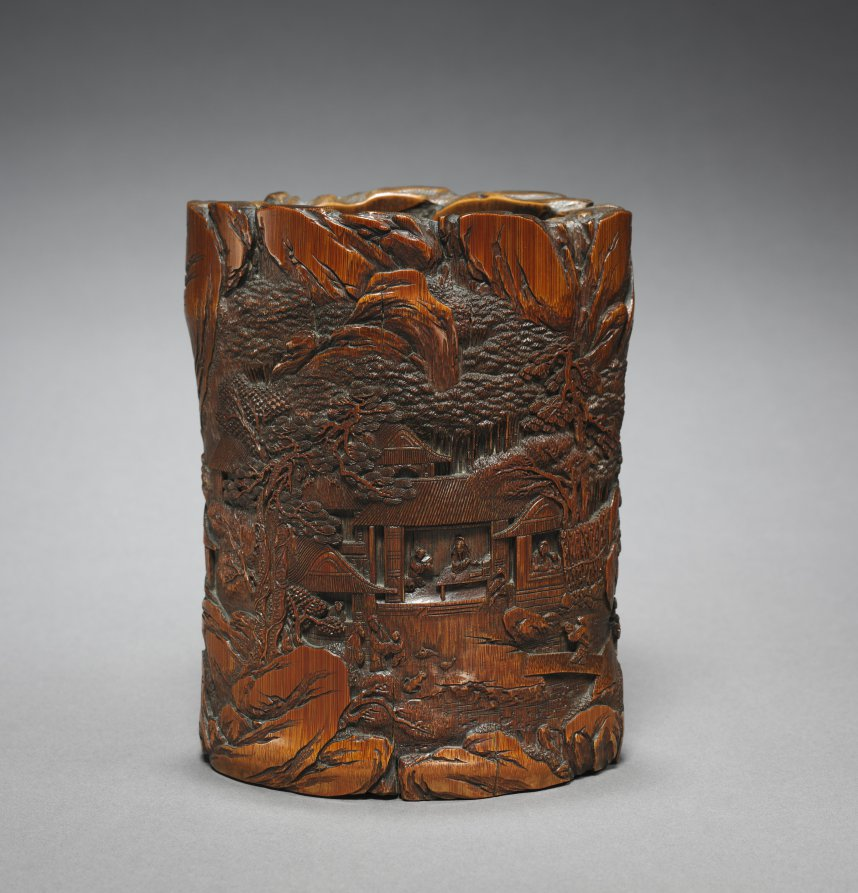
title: Brush Holder with Figures in Landscape and Poetic Inscription by Wang Meilin from Jiading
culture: China, Qing dynasty (1644-1911), Daoguang reign (1821-50)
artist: Wang Meilin (Chinese, active c. 1825)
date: 1800s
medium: carved bamboo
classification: Wood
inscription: A ten-acre [home], a five-acre yard with a water pool, and a thousand bamboos. Don’t say the field is narrow, or the location remote. It is enough to accommodate the knee and rest the shoulder. It has a hall and a yard, a bridge and a boat. It has books and wine, songs and string [instruments]. An old man in the midst of it, his white beard flowing. [He] is moderate and satisfied, has no demands and needs. Like a bird he chooses a branch, builds a nest, and rests at ease. Like a fish in a swamp, that does not know how wide the ocean is. . . . All I like, lies before me. I drink a cup of wine from time to time, recite a [poem], wife and children play, chicken and dogs are at leisure, and I will grow old here.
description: This bamboo brush holder shows a scholar inside a mountain retreat under trees. On its back side, a cliff inscribed with a text by the Tang poet Bai Juyi (772–846) describes the carefree life of a scholar among family and servants in the countryside. The text in cursive script style calligraphy (xingshu) says: A ten-acre [home], a five-acre yard with a water pool, and a thousand bamboos. Don’t say the field is narrow, or the location remote. It is enough to accommodate the knee and rest the shoulder. It has a hall and a yard, a bridge and a boat. It has books and wine, songs and string [instruments]. An old man in the midst of it, his white beard flowing. [He] is moderate and satisfied, has no demands and needs. Like a bird he chooses a branch, builds a nest, and rests at ease. Like a fish in a swamp, that does not know how wide the ocean is. . . . All I like, lies before me. I drink a cup of wine from time to time, recite a [poem], wife and children play, chicken and dogs are at leisure, and I will grow old here.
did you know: Bamboo was considered a humble material that suited the Confucian ideals of frugality and modesty.